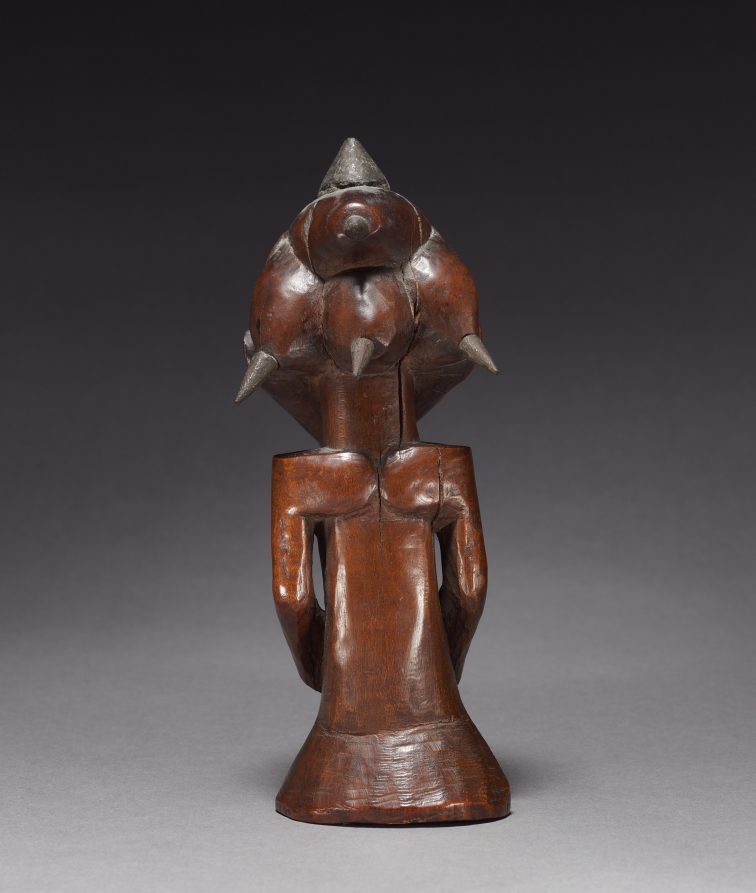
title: Half-Figure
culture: Africa, Central Africa, Democratic Republic of the Congo, probably Kusu-style maker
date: late 1800s–early 1900s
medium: Wood and iron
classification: Sculpture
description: Iron tacks inserted into the lobes of the hairdo indicate that this sculpture was originally empowered with magical and medicinal substances. Thus charged, the figure would have been used in divination and was related to a powerful association known as Bugabo. Members specialized in healing, hunting, and fighting crime.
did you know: This figure would have been used in a powerful association known as Bugabo, specializing in healing, hunting, and fighting crime.